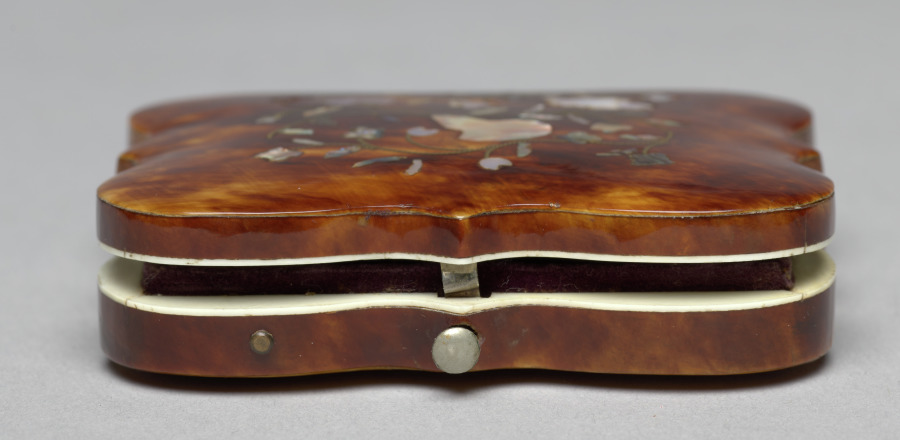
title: Woman with elaborate nautical backdrop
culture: America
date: c. 1860–65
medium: ambrotype, tinted, ninth plate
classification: Photograph